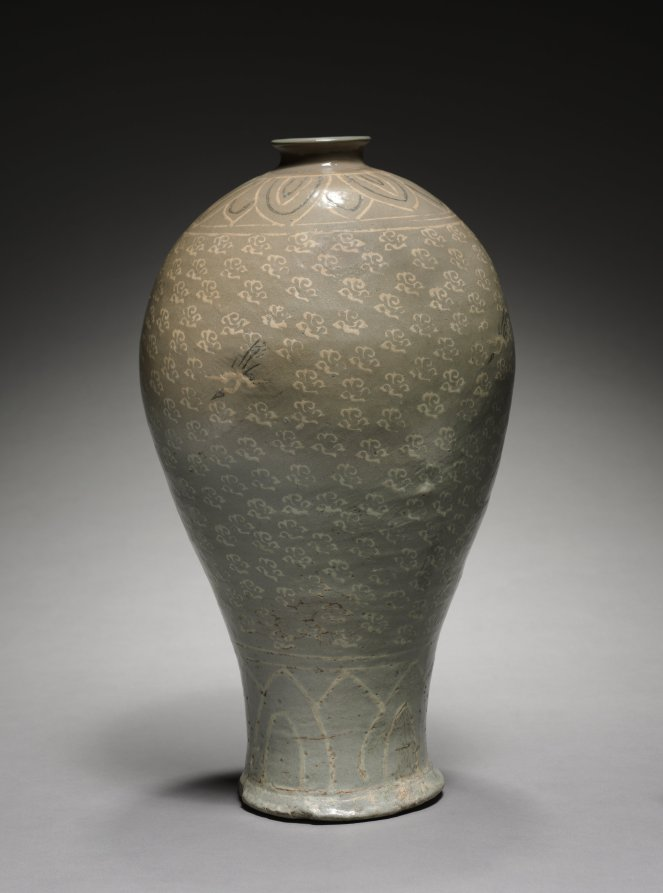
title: Prunus Vase with Inlaid Clouds and Flying Cranes Design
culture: Korea, Goryeo dynasty (918–1392)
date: 1300s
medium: celadon ware with inlaid white and black slip decoration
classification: Ceramic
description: As early as the seventh century, the practice of drinking tea and wine became an important part of elite culture in Korea. Once used to store alcoholic beverages, this type of vase features a wide body followed by a sharply rounded shoulder, a short neck and a small opening. Most of the remaining examples no longer have a lid, but originally it may have had a lid that not only covered the opening, but also served as a cup.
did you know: Prunus vases such as this one are often believed to contain a branch of plum blossoms, but recent research reveals that these lidded vases were also used to contain cooking liquid such as sesame oil.